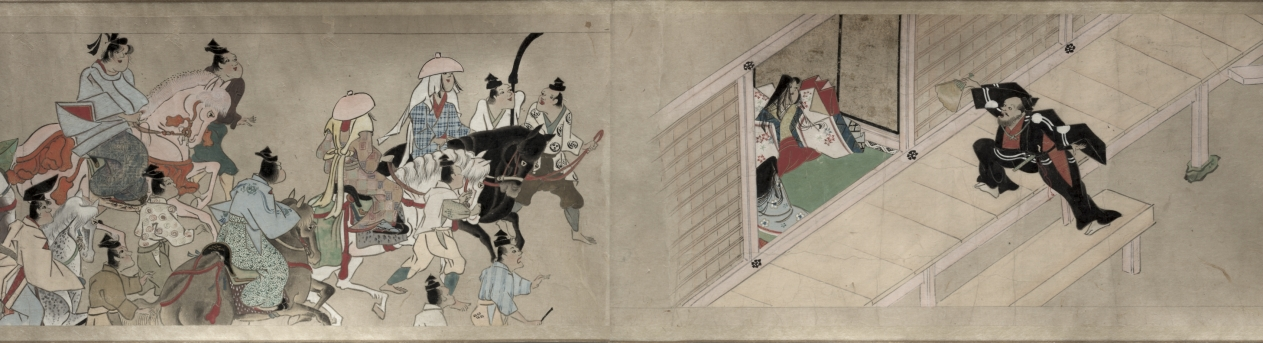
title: The Saltmaker's Story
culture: Japan, Edo period (1615–1868)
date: early 1600s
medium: One of a pair of handscrolls; ink, color, and gold on paper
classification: Painting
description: Once read and copied by girls at New Year’s celebrations and included in dowries, The Saltmaker’s Story is a rags-to-riches tale in which daughters are gifts from the gods. Despite his simple outlook, the main character progresses from humble roots as an associate at Kashima Shrine to the elite status of grandfather of the emperor through the intervention of the Kashima deity. The Saltmaker’s Story is traditionally presented in a set of three scrolls, but the text of this set has been removed by a previous owner, who remounted the illustrations as a pair. The paintings of this one take us from right to left through the second half of the tale.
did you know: This handscroll originally had texts before its paintings, but the texts were removed.